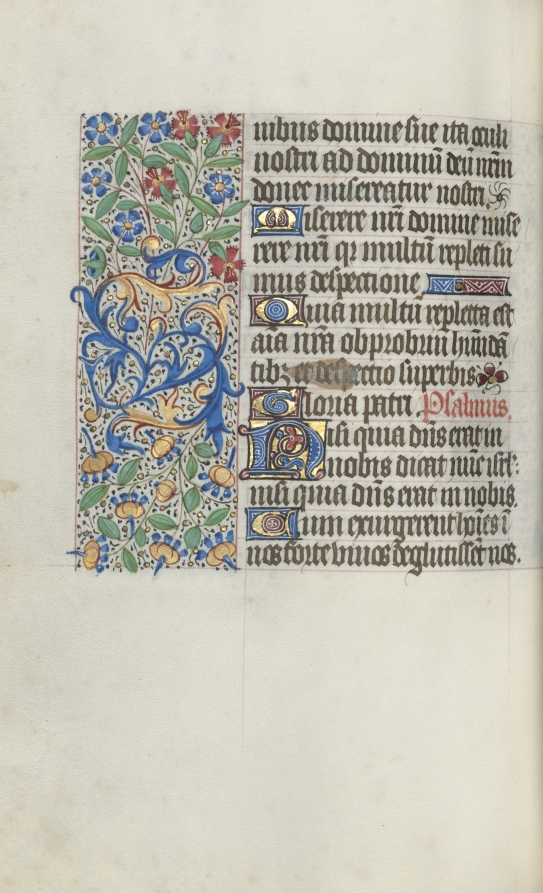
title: Book of Hours (Use of Rouen): fol. 70v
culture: France, Rouen, 15th century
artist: Master of the Geneva Latini (French, active Rouen, 1460–80)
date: c. 1470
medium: ink, tempera, and gold on vellum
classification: Bound Volume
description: In the late 1400s and early 1500s Rouen was an established and important center of book production. The city’s cathedral had a wealthy chapter that spent large sums of money to commission books and to maintain its extensive library. The stationers and booksellers would have likely been concentrated in or near the cathedral precinct. This artist, named after a manuscript now in Geneva, was Rouen’s principal illuminator during the second half of the 1400s.